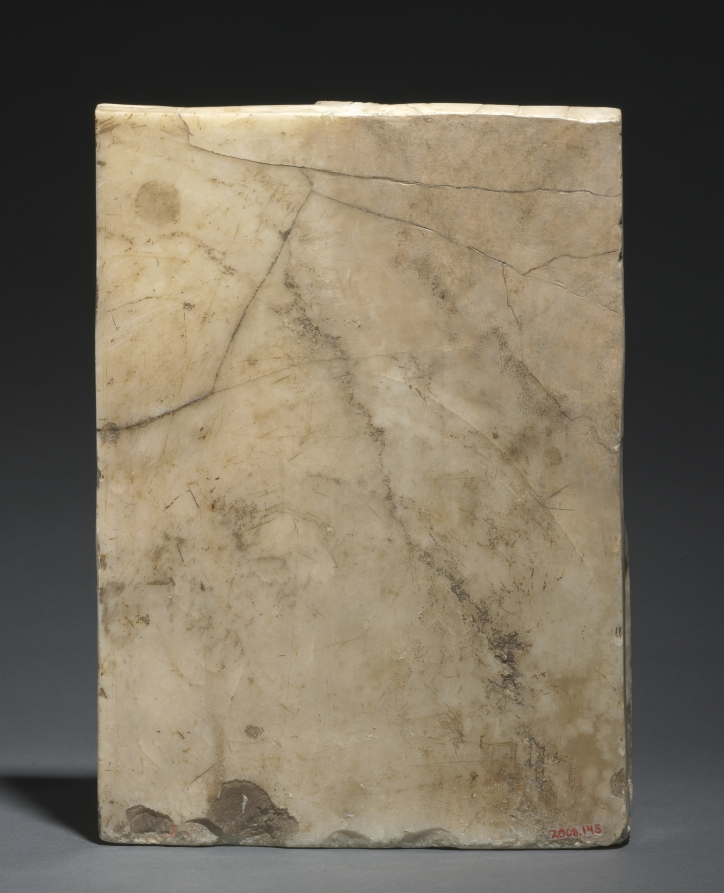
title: Enthroned Virgin and Child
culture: Spain, Burgos, 15th century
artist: Gil de Siloé (Spanish, active c. 1475–1505)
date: c. 1480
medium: alabaster with traces of gilding and polychromy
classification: Sculpture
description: The seated Virgin Mary with Christ is one of the most popular themes in Christian art of the Middle Ages. Alabaster was an ideal material to depict the fleshiness of Jesus, the lush folds of Mary’s cloak, and the fine details of the throne and gown. Christ is reaching for something in his mother’s hand that is now unrecognizable because alabaster tends to break or wear away quickly. It may have been a book or a piece of fruit. Given its small size, it is likely that this sculpture was intended for private use.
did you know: This sculpture was possibly made for Queen Isabella, the Spanish ruler who sponsored Christopher Columbus.